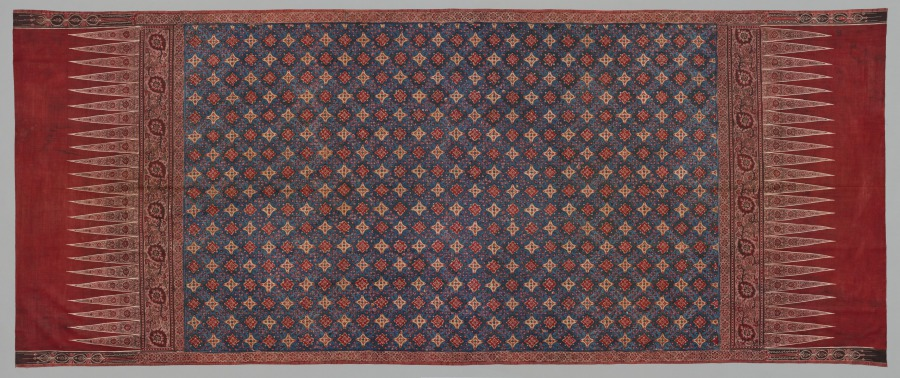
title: Hip Wrapper (tapis)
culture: India, Coromandel Coast, 1st half 19th Century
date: 1800–1850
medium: cotton; plain weave; block printed, drawn resist, painted mordants, dyed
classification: Textile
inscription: "16" embroidered in India